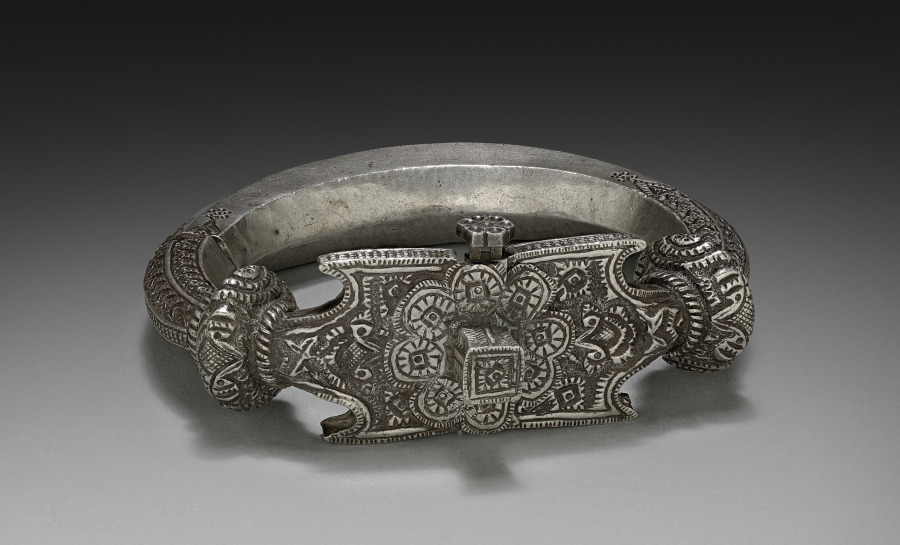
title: Bracelet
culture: India, Karachi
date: 1800s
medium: silver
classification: Jewelry